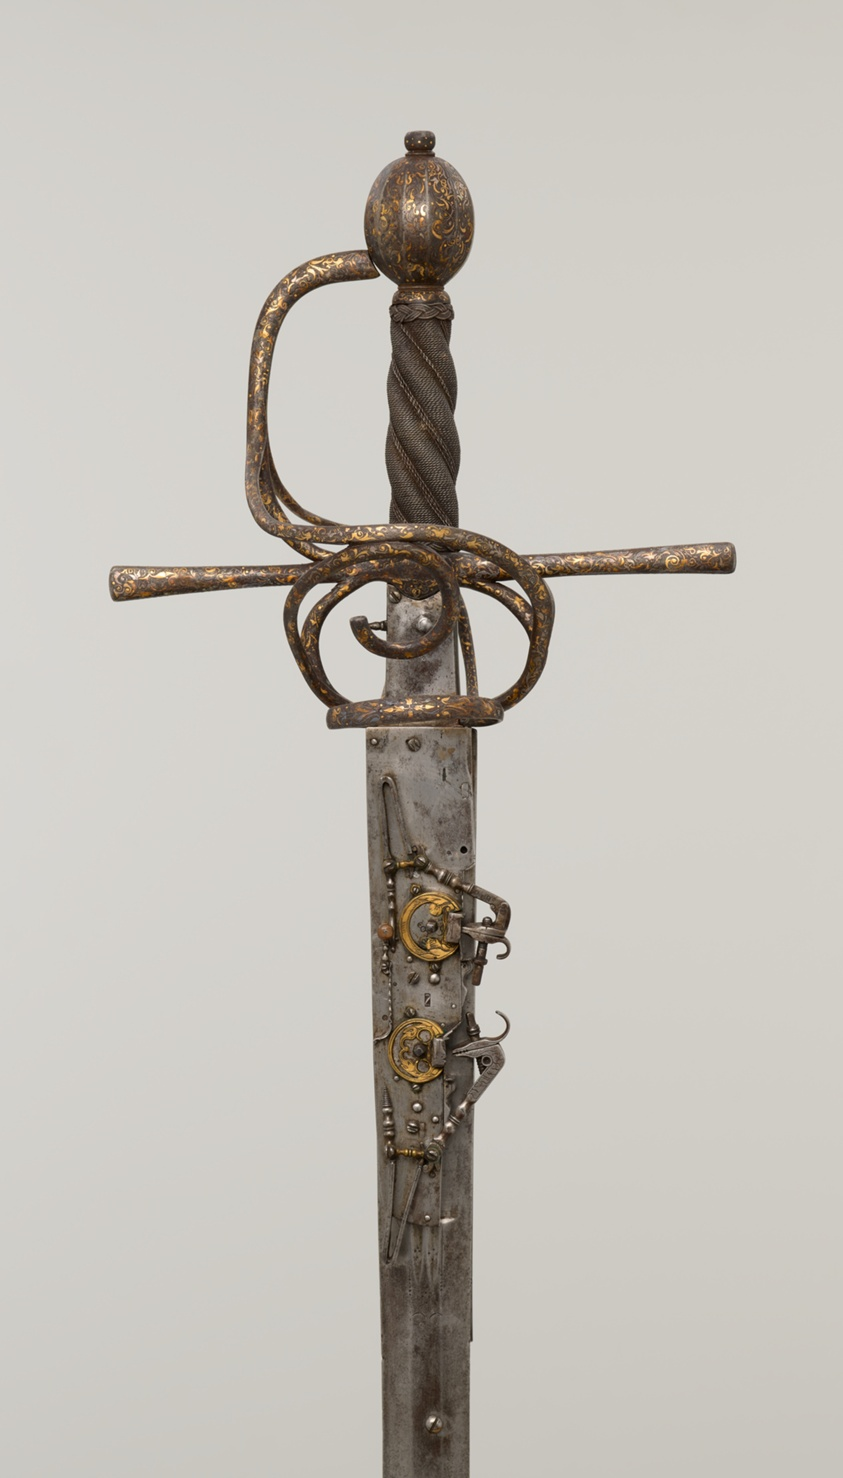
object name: Arms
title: Rapier Combined with two Wheel-Lock Pistols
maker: German; Bladesmith: Hernandez Sebastian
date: c. 1600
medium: Steel, iron, brass, gold, silver, gilding, and wood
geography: Germany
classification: combination weapon; arms; arms and armor